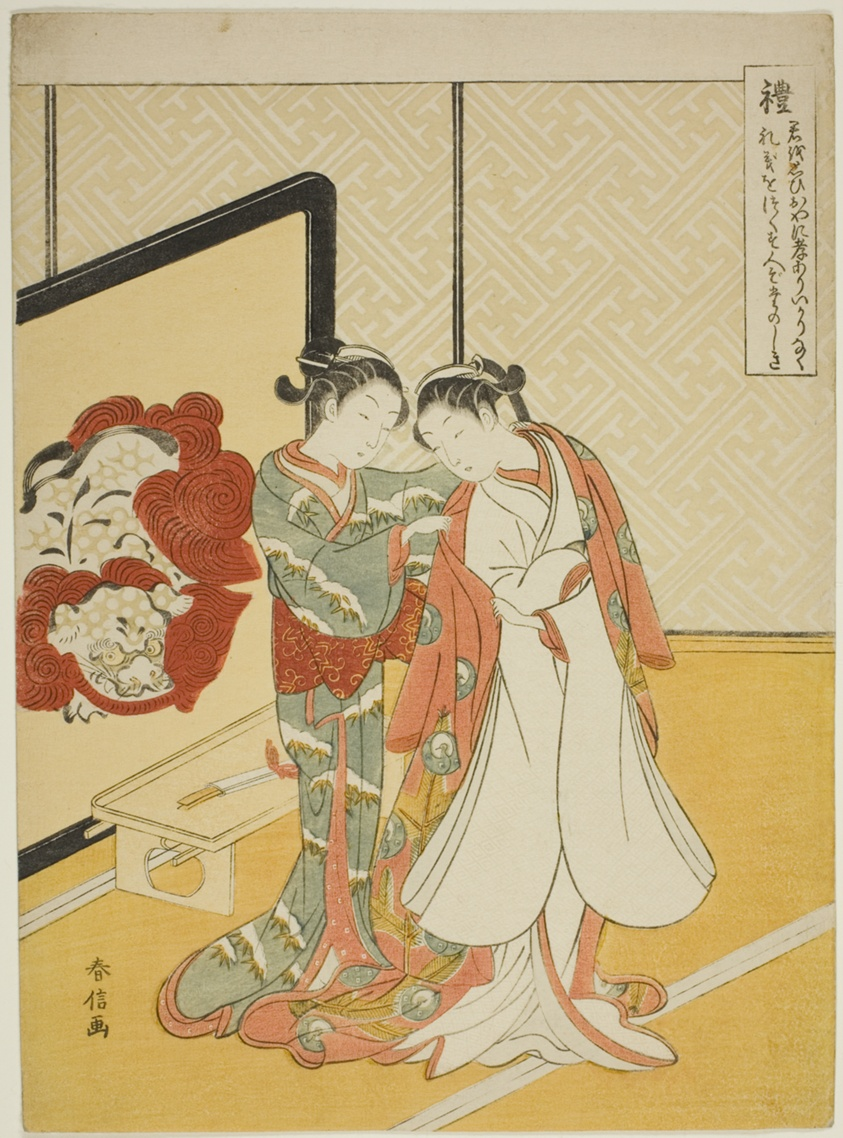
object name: Print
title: Courteousness (Rei), from the series "Five Cardinal Virtues"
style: Japanese (culture or style)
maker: Suzuki Harunobu 鈴木 春信; Japanese, 1725 (?)-1770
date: 1767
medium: Color woodblock print; chuban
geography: Japan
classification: woodblock print; print; asian art